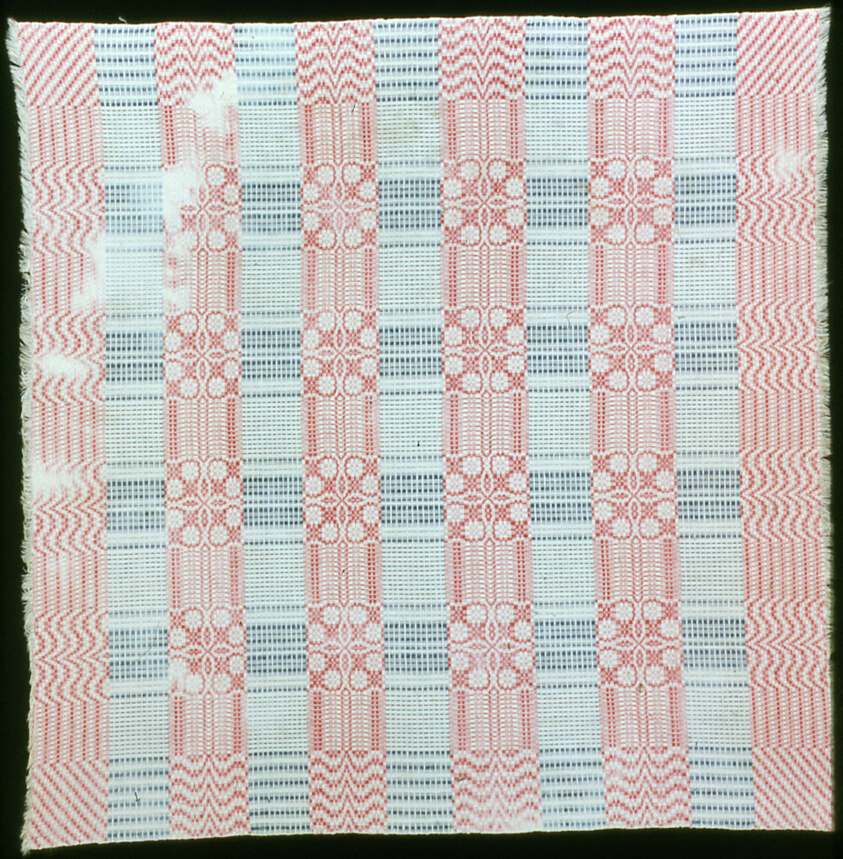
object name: Textile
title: Panel (Originally a Lucnheon Cloth)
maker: Sweden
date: c. 1775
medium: Cotton, plain weave with supplementary patterning wefts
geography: Sweden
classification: textile; weaving